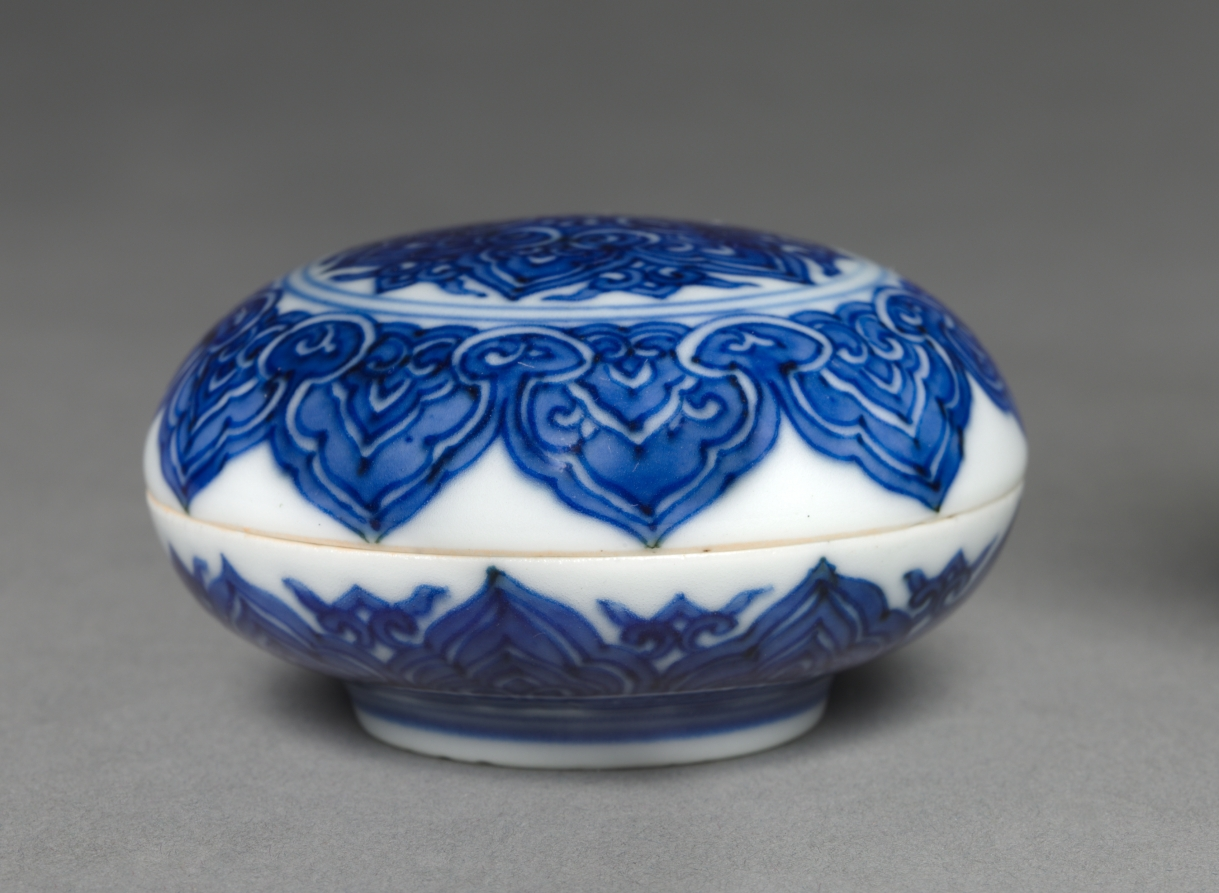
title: Round Covered Box with Medallions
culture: China, Jiangxi province, Jingdezhen kilns, Ming dynasty (1368-1644), Jiajing mark and reign (1522-66)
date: 1522–66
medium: porcelain with underglaze blue decoration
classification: Ceramic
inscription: 大明嘉靖年製